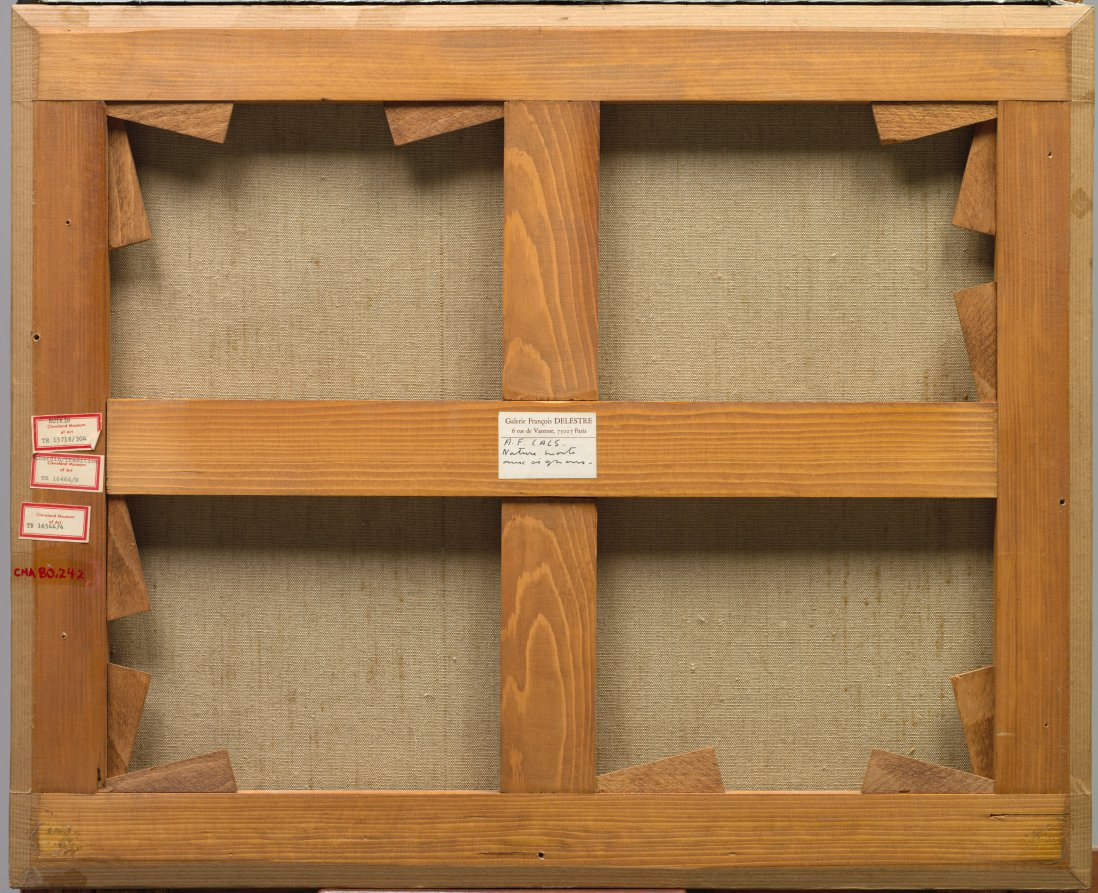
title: Still Life with Vegetables, Partridge, and a Jug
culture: France, 19th century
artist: Adolphe-Félix Cals (French, 1810–1880)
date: 1858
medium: oil on fabric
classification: Painting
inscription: Signed upper left: Cals 1858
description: During the 19th century, a number of painters used common objects (rather than rare or refined objects) to create still lifes that some critics judged as unfit for the drawing room: studies of carrots, cabbages, asparagus, oysters, onions, eggs, and cooking utensils. Often these subjects were chosen for their mealtime associations. The food represented on the table in this painting—a partridge, onions, and cabbage—are the main ingredients for the well-known dish perdrix au chou (partridge with cabbage). Cals, however, was also interested in exploring underlying compositional design principles and studying the shapes of the objects he depicted. Cals lived and worked in and around Paris for most of his life, though in 1871 he moved to Normandy. In 1874 he participated in the first Impressionist exhibition and continued to do so until 1879. Although still lifes were an important part of his production, they were not his specialty. He preferred to work outdoors, in places chosen during his daily strolls. Art critic Edmond About, who was usually not very generous with compliments, characterized Cals as the most sincere and genuine artist he had ever known.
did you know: In this painting, Cals even includes the metal pitcher that holds the liquid in which the perdrix au chou (partridge with cabbage) will be cooked.